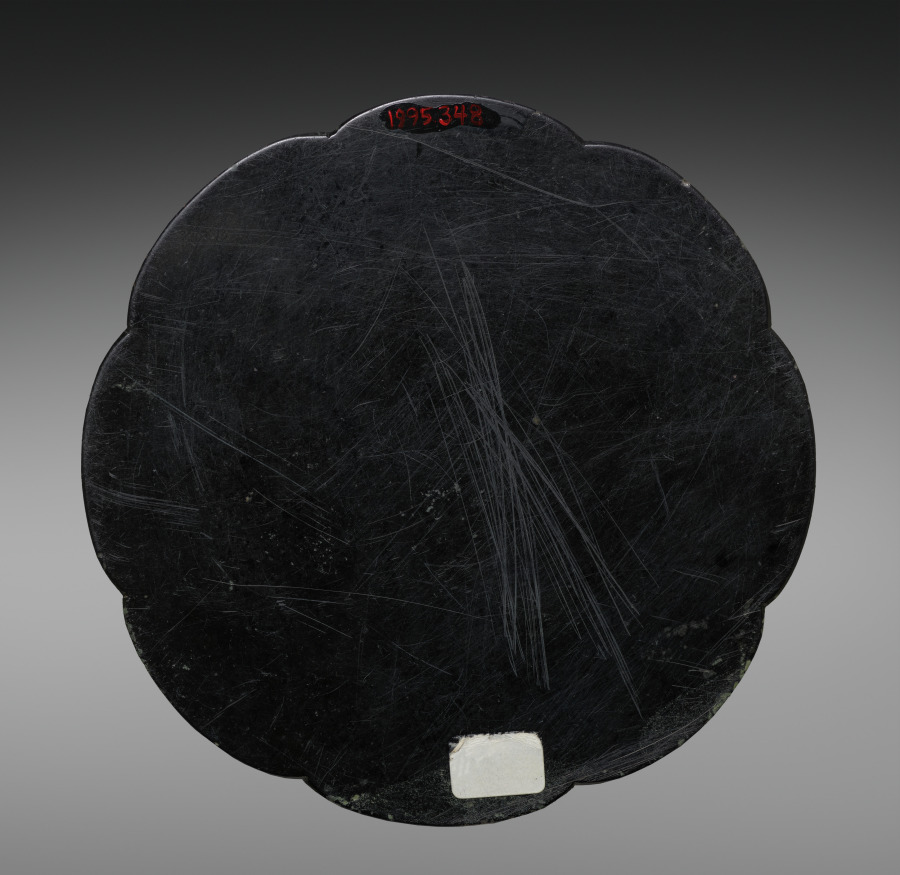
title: Lobed Mirror with Paired Phoenixes and Floral Displays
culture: China, Tang dynasty (618-907)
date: 700s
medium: bronze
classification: Metalwork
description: Lobed Mirror with Two Phoenixes and Floral Displays, 8th century ad China, Tang dynasty (ad 618-907) CMA 1995.348 [Cat. no. 66.a]